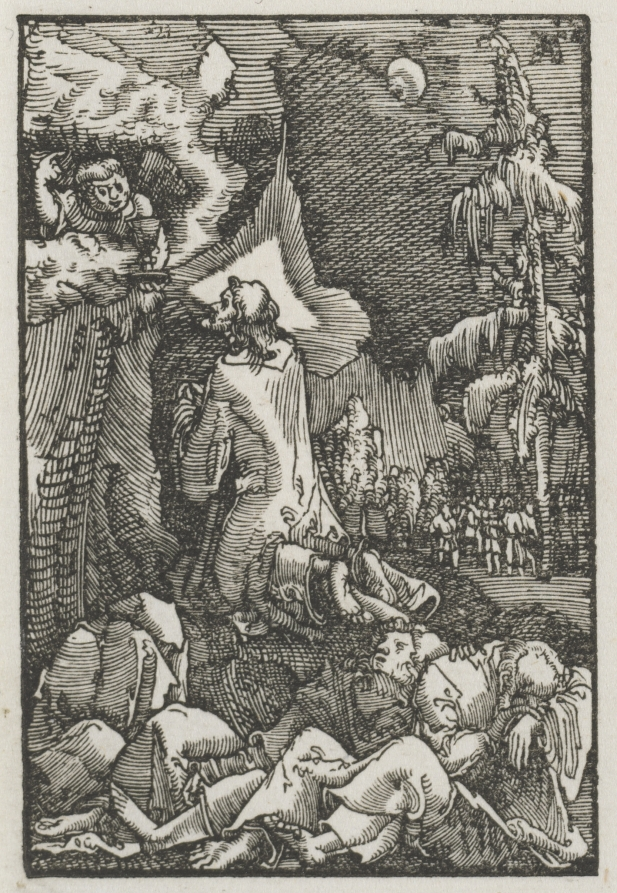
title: The Fall and Redemption of Man: Christ on the Mount of Olives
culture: Germany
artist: Albrecht Altdorfer (German, c. 1480–1538)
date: c. 1515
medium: woodcut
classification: Print